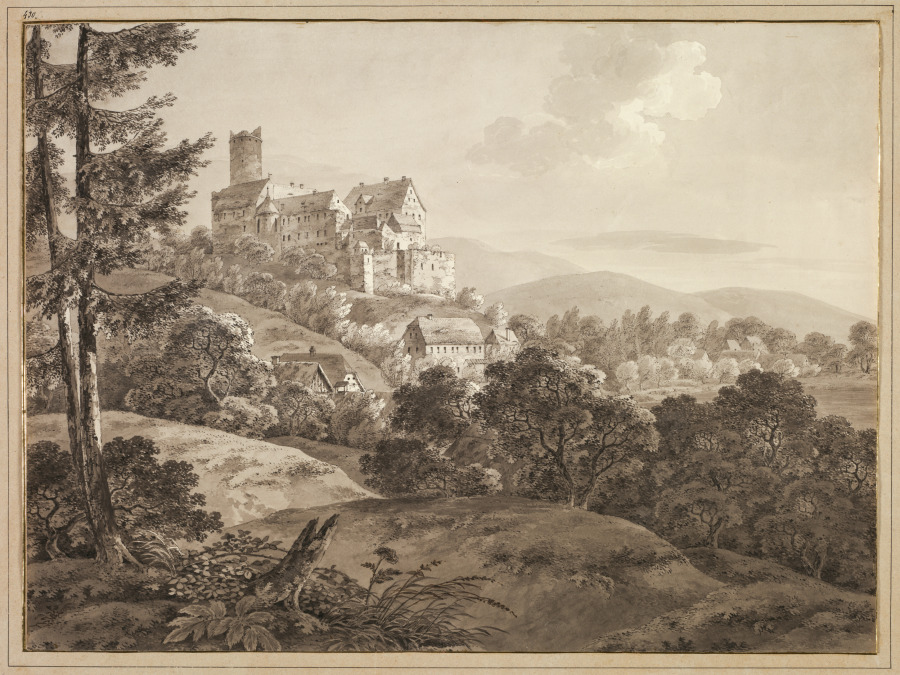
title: View of the Castle Gnandstein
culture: Switzerland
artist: Adrian Zingg (Swiss, 1734–1816)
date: c. 1795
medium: Gray wash and black ink (applied with pen and point-of-brush) with brown ink and traces of graphite underdrawing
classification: Drawing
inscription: Inscribed (verso), lower left, in graphite: AR BRG / A. Zingg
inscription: Inscribed (mount), lower right, in graphite: Zingg, Adrian / Ansicht des Schlosses / Gnandstein. / Feder u[nd] get[uscht]. 15 N.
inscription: lower right, in black ink: Zingg, Adrian, Zeichner & Kupferstecher / gib 1734 zu St Gallen gest. 1816 zu Leipzig